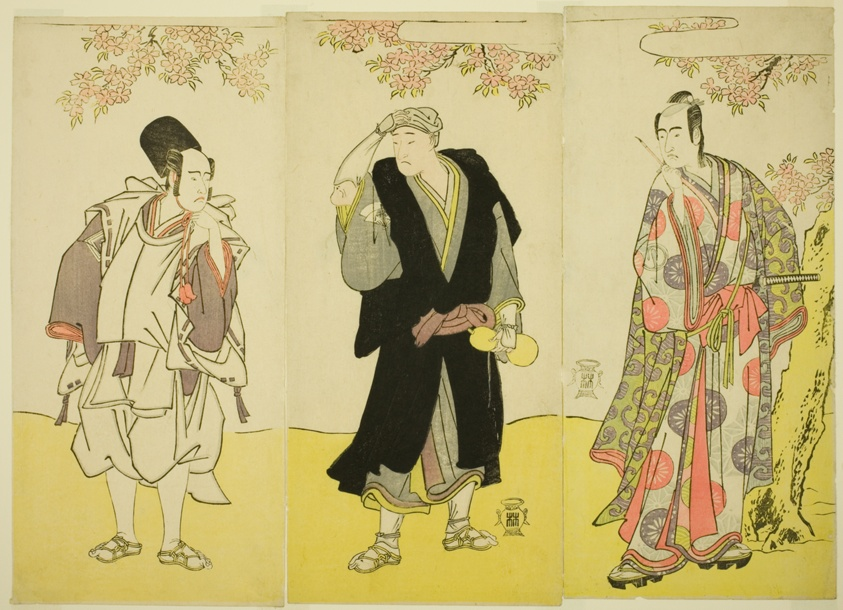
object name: Print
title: The Actors Sawamura Sojuro III as Kusunoki Tatewaki Masatsura (right), Onoe Matsusuke I as the Monk Sahei Bozu (center) and Ichikawa Yaozo III as the Prince's Servant Kusunoki Uraminosuke (left), in the Play Kumoi no Hana Yoshino no Wakamusha, Performed at the Nakamura Theater in the Eleventh Month, 1786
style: Japanese (culture or style)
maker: Katsukawa Shunsho 勝川 春章; Japanese, 1726-1792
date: c. 1786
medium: Color woodblock print; hosoban; three sheets of a four-sheet composition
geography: Japan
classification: woodblock print; print